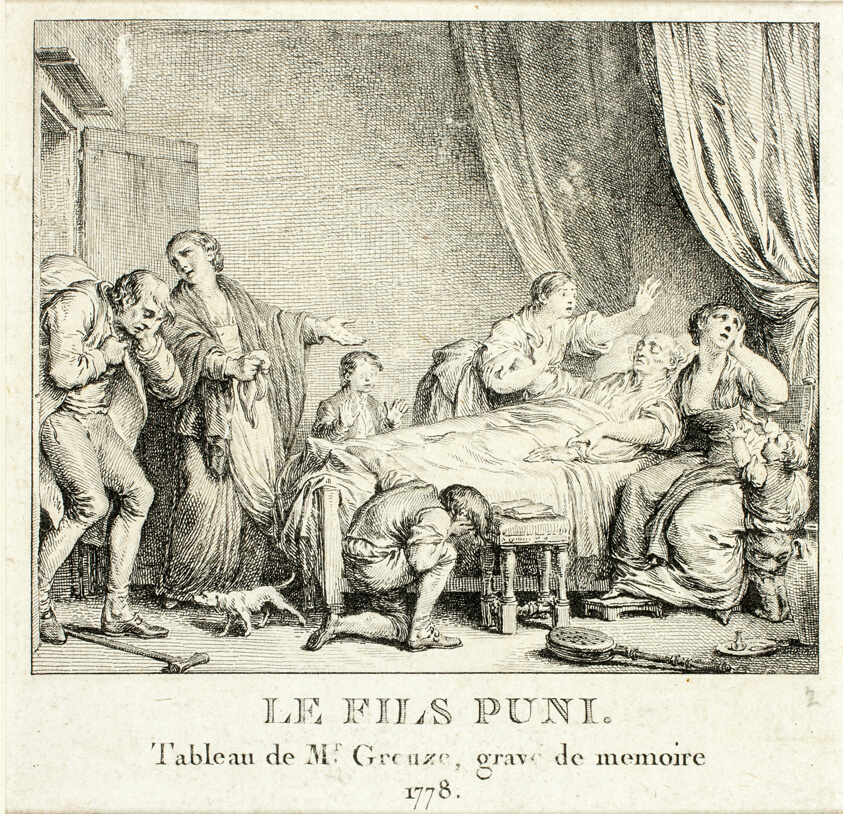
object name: Print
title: The Punished Son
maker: Jean Michel Moreau (French, 1741-1814); after Jean-Baptiste Greuze (French, 1725-1805)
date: 1777–78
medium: Etching with engraving on paper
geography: France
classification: etching; print; prints and drawing